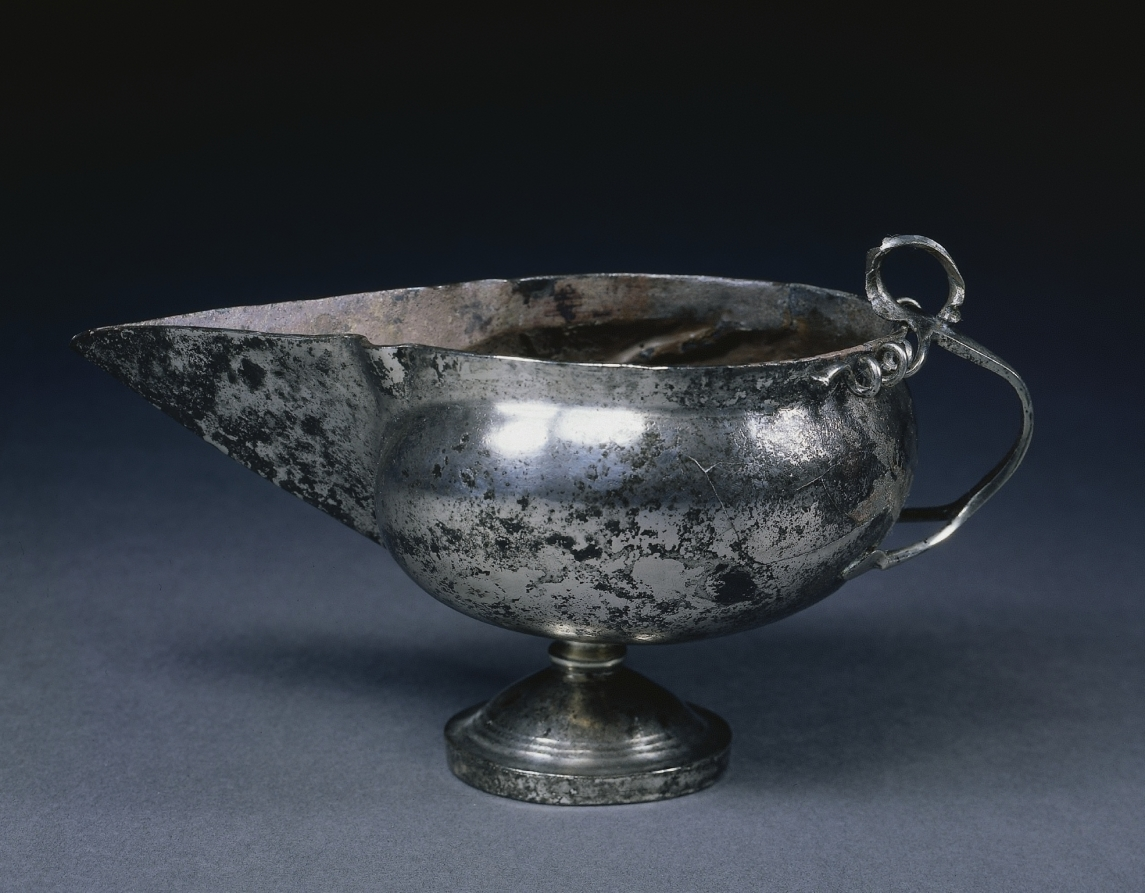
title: Spouted Pitcher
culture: Byzantium, Syria(?), Byzantine period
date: 300–600 CE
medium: silver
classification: Metalwork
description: A large quantity of tableware survives from the Roman Empire, including this piece from Antioch and the Eastern Mediterranean. Most of the recovered groups of silver seem to have been hoards concealed during times of trouble. A complete table service, called a ministerium in Latin and a synthesis in Greek, consisted of silver for eating and drinking: trays, platters, plates, dishes, spoons, pepper dispensers, goblets, pitchers, ladles, and bowls. The god of wine, Dionysos, was frequently depicted on drinking and eating vessels.